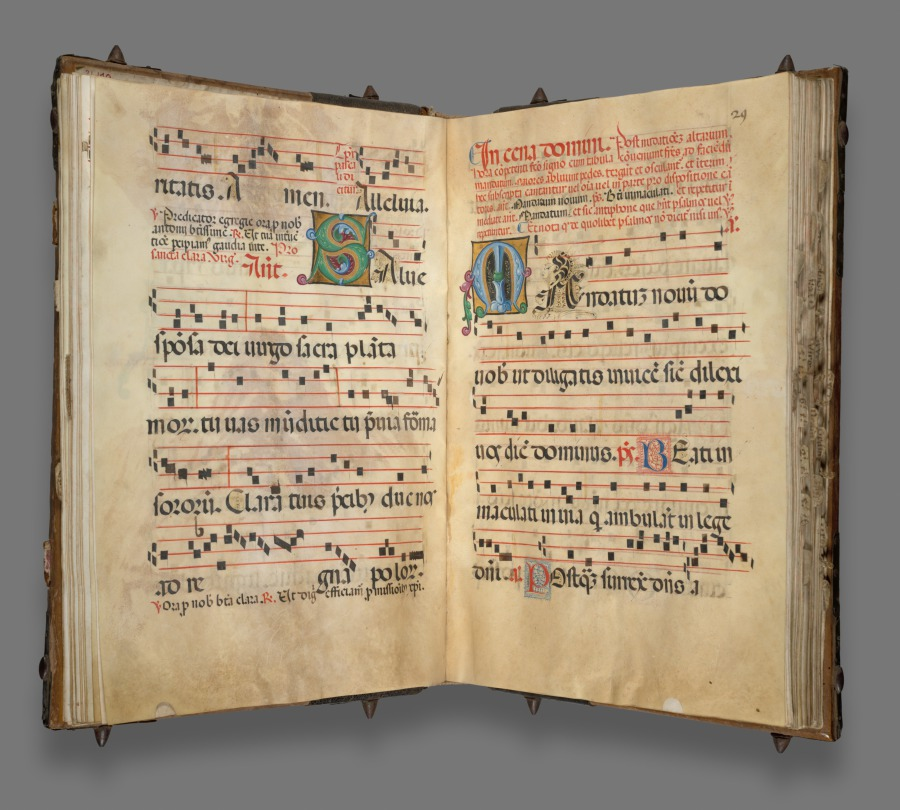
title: Gradual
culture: Italy, Verona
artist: circle of Girolamo dai Libri (Italian, 1474–1555)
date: c. 1520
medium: Ink, tempera, and gold on vellum; wood binding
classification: Manuscript